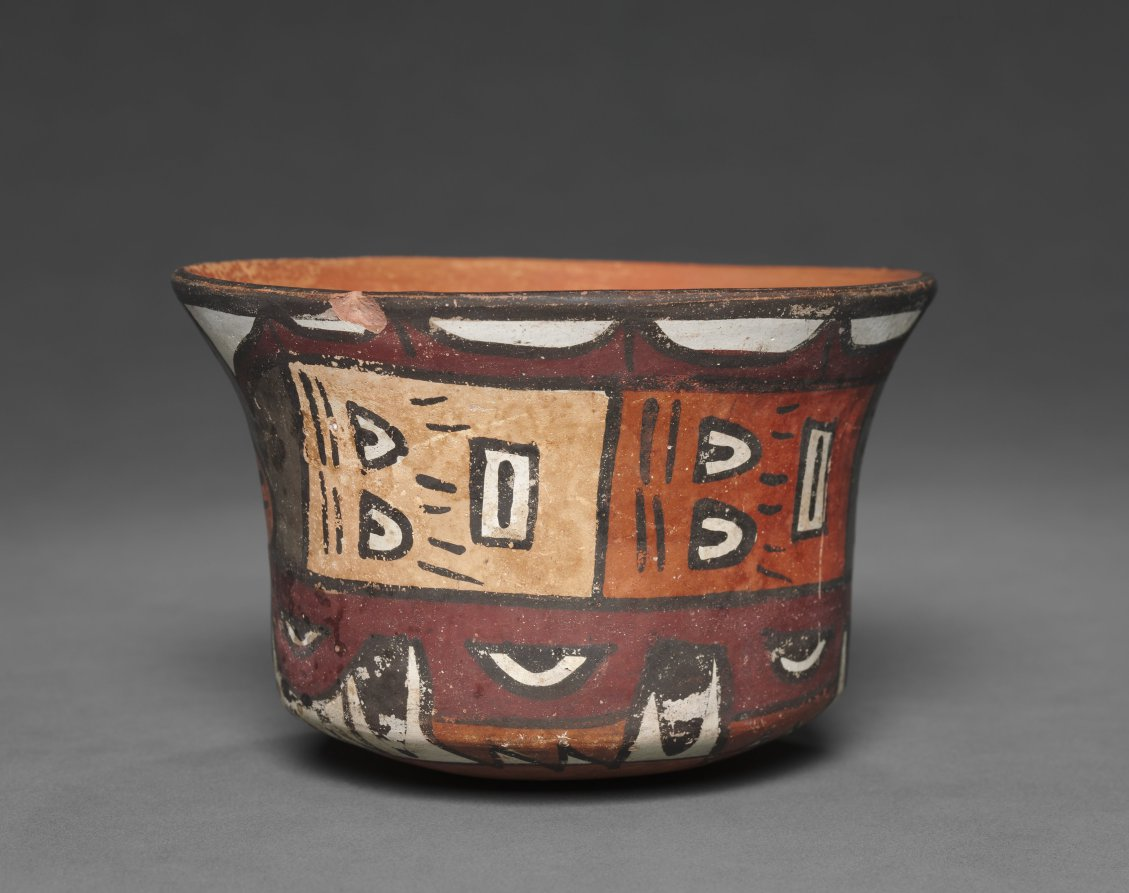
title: Bowl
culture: Peru, South Coast, Nasca, Florescent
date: 100 BCE–700 CE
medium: earthenware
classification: Ceramic